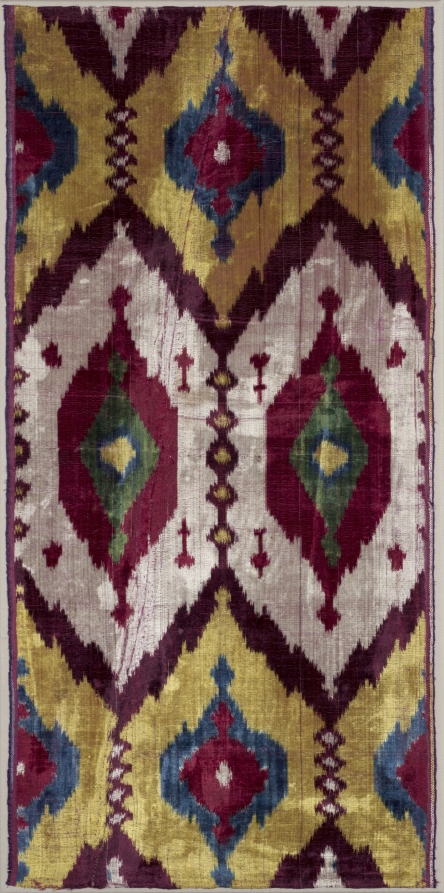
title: Length of silk velvet ikat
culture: Uzbekistan, Bukhara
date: 1875–1900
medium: Silk: warp ikat, velvet weave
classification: Textile